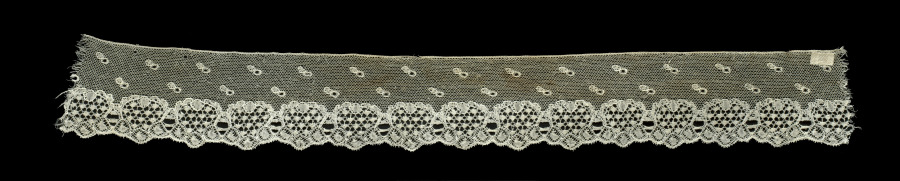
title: Lace Edging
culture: England, Buckinghamshire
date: 1780–99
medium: Linen: bobbin lace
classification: Lace